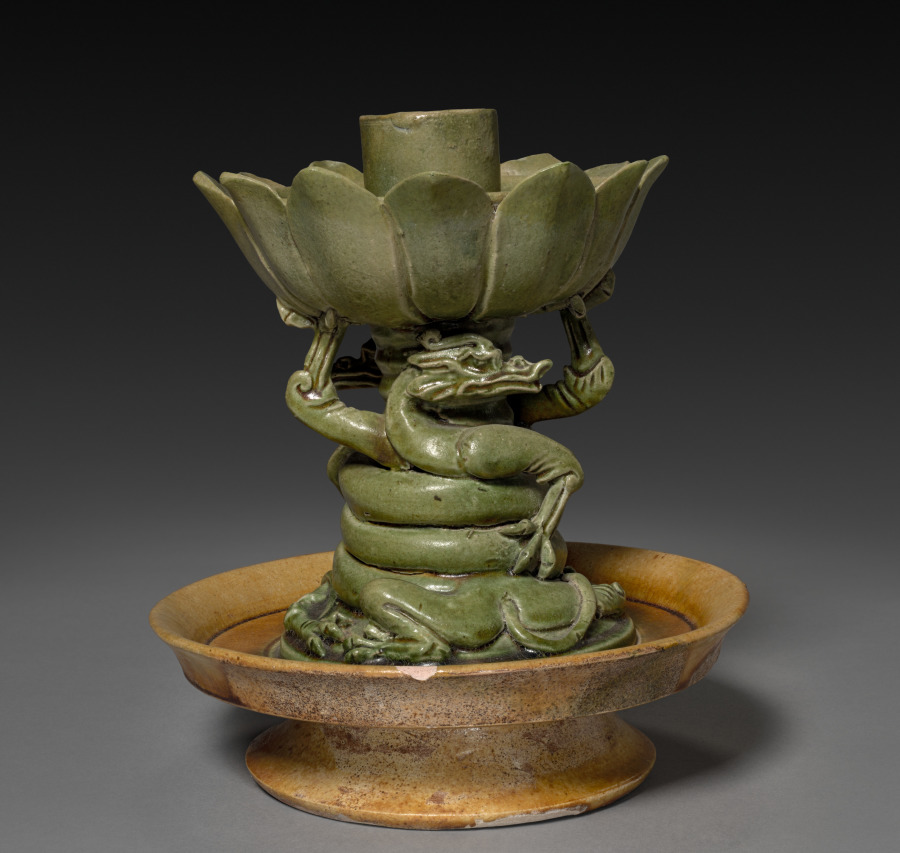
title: Lamp Stand with Coiling Dragons and Lotus Design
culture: China, Sui dynasty (581-618) to early Tang dynasty (618-907)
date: 581–907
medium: Glazed earthenware, sancai (three-color ware)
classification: Ceramic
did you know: This lampstand presents a coiling dragon and an elaborately shaped flower-petal dish.